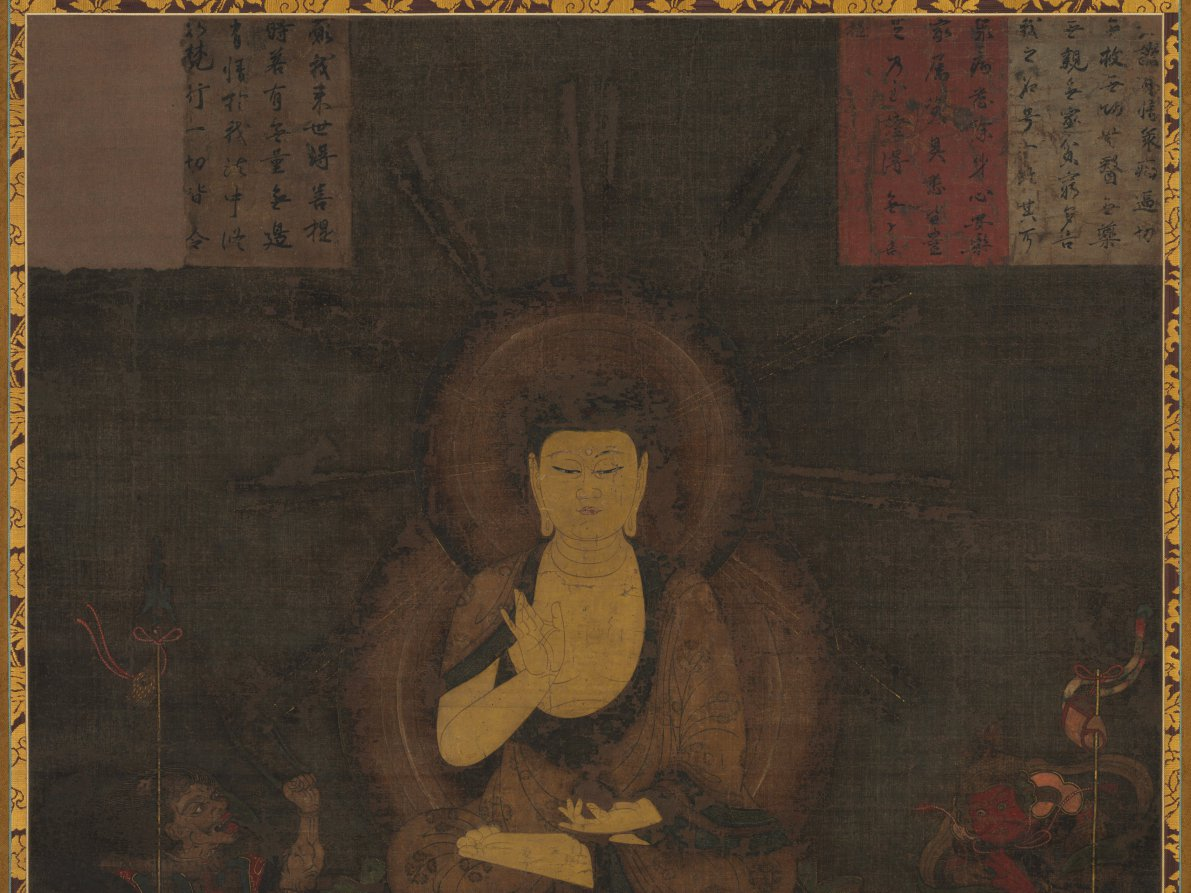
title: Medicine Master Buddha and the Twelve Divine Generals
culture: Japan, Kamakura period (1185–1333)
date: 1200s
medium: Hanging scroll painting; ink, color, gold, and silver on silk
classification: Painting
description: From the 700s, people in Japan began praying to the Medicine Master Buddha (Yakushi Nyorai) for longevity. Yakushi is at the center of this image, flanked by the bodhisattvas of the sun and moon, Nikkō and Gakkō. The Twelve Divine Generals, a group of protective deities, surround him. Yakushi sits in a meditative pose with his right hand in a gesture bestowing fearlessness while his left hand holds a medicine jar. In the upper part of the painting, rectangles simulating decorative paper inscription slips contain excerpts from a sacred text about Yakushi, in which he asks that sick people who speak his name should become well and that all who hear his name might have their purity restored.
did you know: Each of the Divine Generals has an identifying zodiac animal in his hair or headdress.